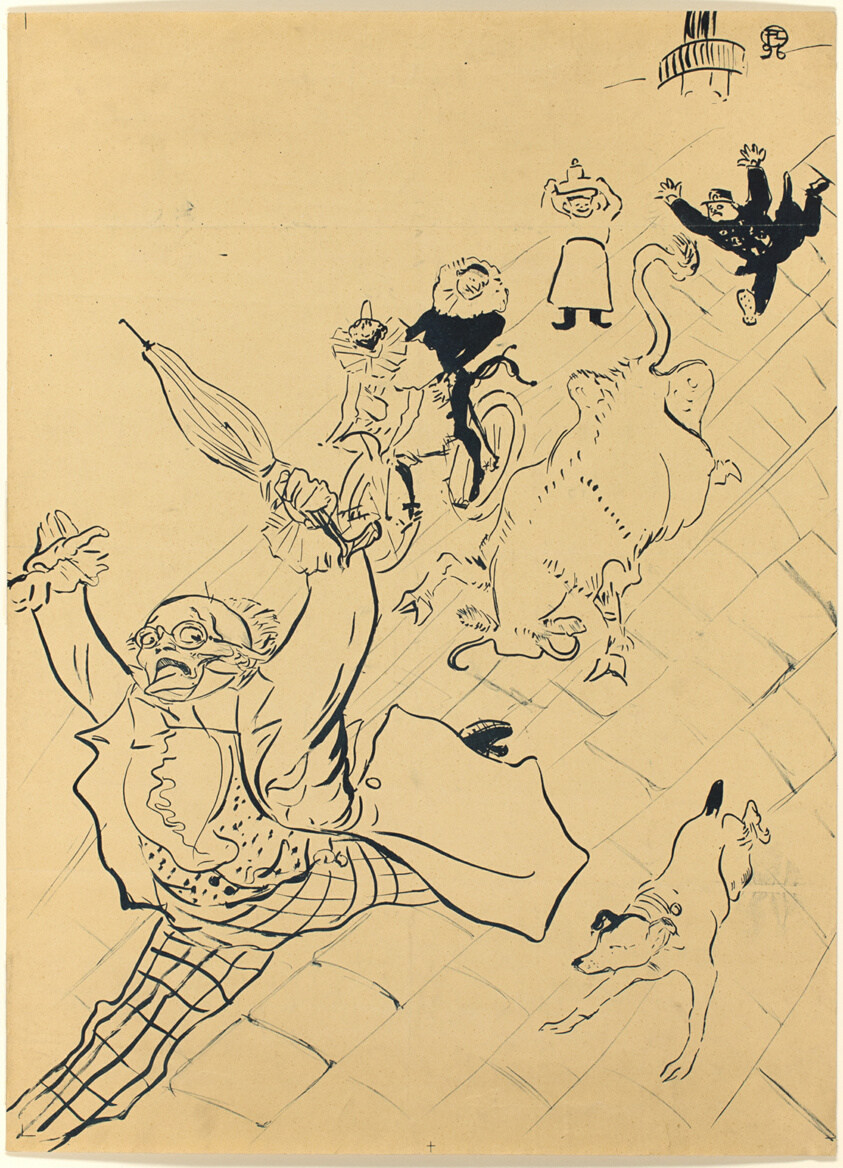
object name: Print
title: La vache enragée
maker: Henri de Toulouse-Lautrec (French, 1864-1901)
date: 1896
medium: Lithograph poster on tan wove paper, laid down on fabric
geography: France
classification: lithograph; print; prints and drawing; poster